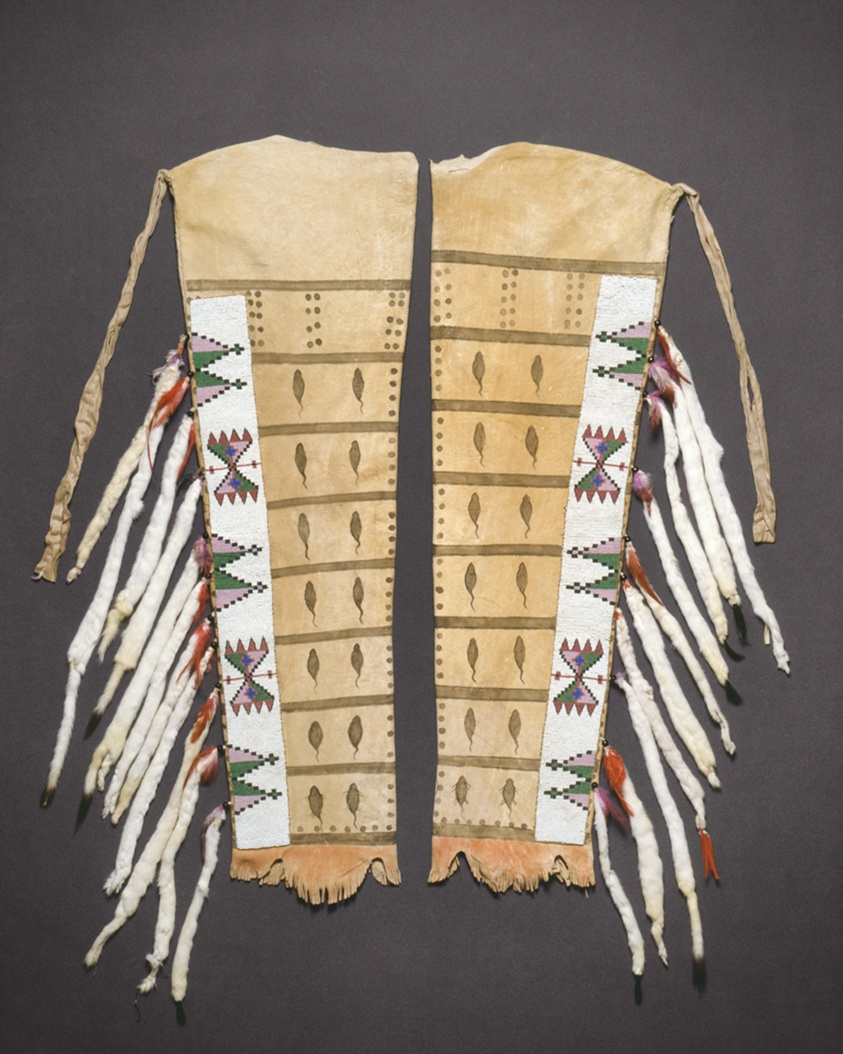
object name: Costume and Accessories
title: Leggings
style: blackfoot, plains indian, native american, americas, native north american, Arts of the Americas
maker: Artist unknown (Blackfoot, Niitsitapi, possibly Blackfeet Nation, Aamskapi Piikáni); Northern Plains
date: 1880–90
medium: Deer hide, ermine skin, beads, and pigment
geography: Northern Plains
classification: leather/animal skin; costume; art of the americas